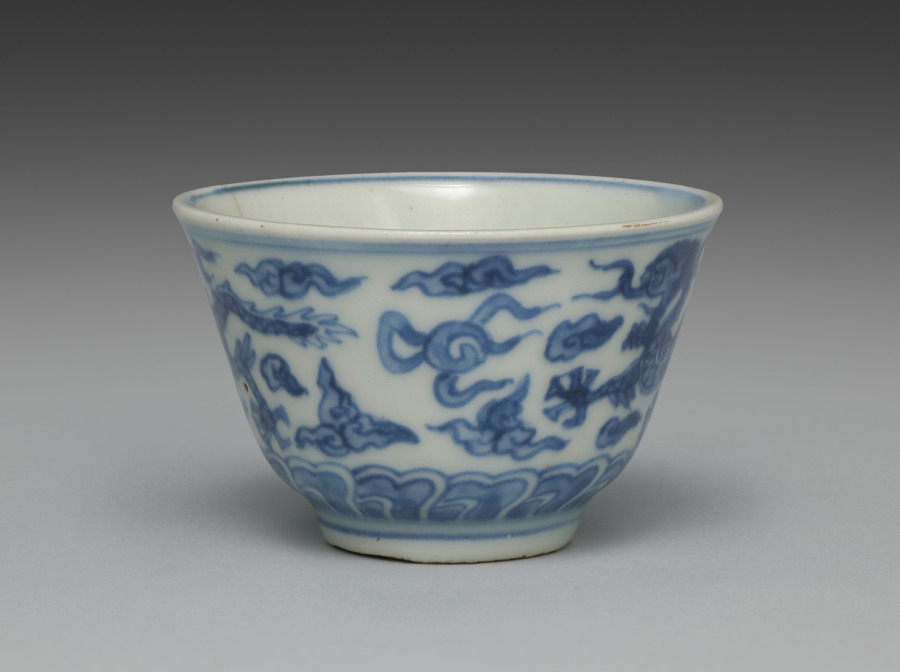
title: Cup from Tea Cups with Dragons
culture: Japan, Edo period (1615–1868)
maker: Seifū Yohei I (Japanese, 1801–1861)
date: 1840s–57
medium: One from a set of five tea cups; porcelain with underglaze blue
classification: Ceramic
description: Seifū Yohei I made both blue and white porcelains after Ming dynasty (1368–1644) Chinese wares fired in the kilns at Jingdezhen for export. He also made colorful stoneware in the style of his teacher, Nin’ami Dōhachi (Takahashi Dōhachi II) (1783–1855).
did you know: A small figure of an elephant serves as the handle for the lid.